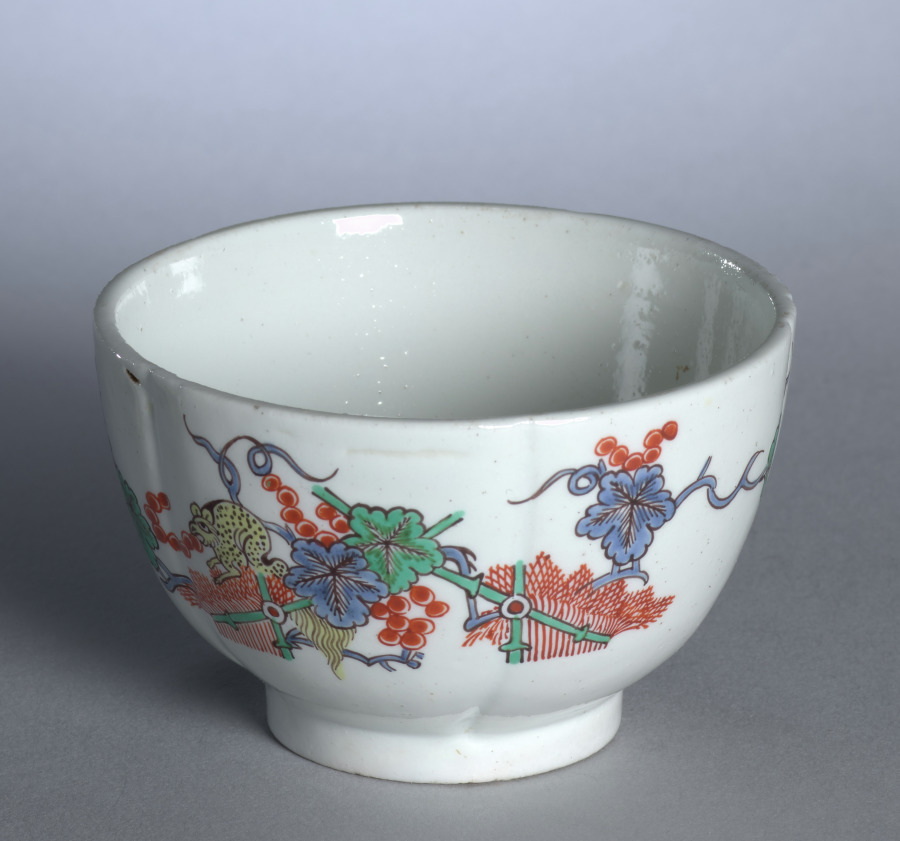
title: Sugar Bowl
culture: France, Chantilly, 18th century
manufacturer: Chantilly Porcelain Factory (French)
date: c. 1730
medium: soft-paste porcelain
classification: Ceramic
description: The pieces composing this individual tea set are entirely typical of Chantilly soft-paste porcelain in the Kakiemon style. Both the form and decoration of these pieces were inspired by Japanese prototypes. The use of knobs in the form of trumpet-shaped blossoms is characteristic of Chantilly wares.